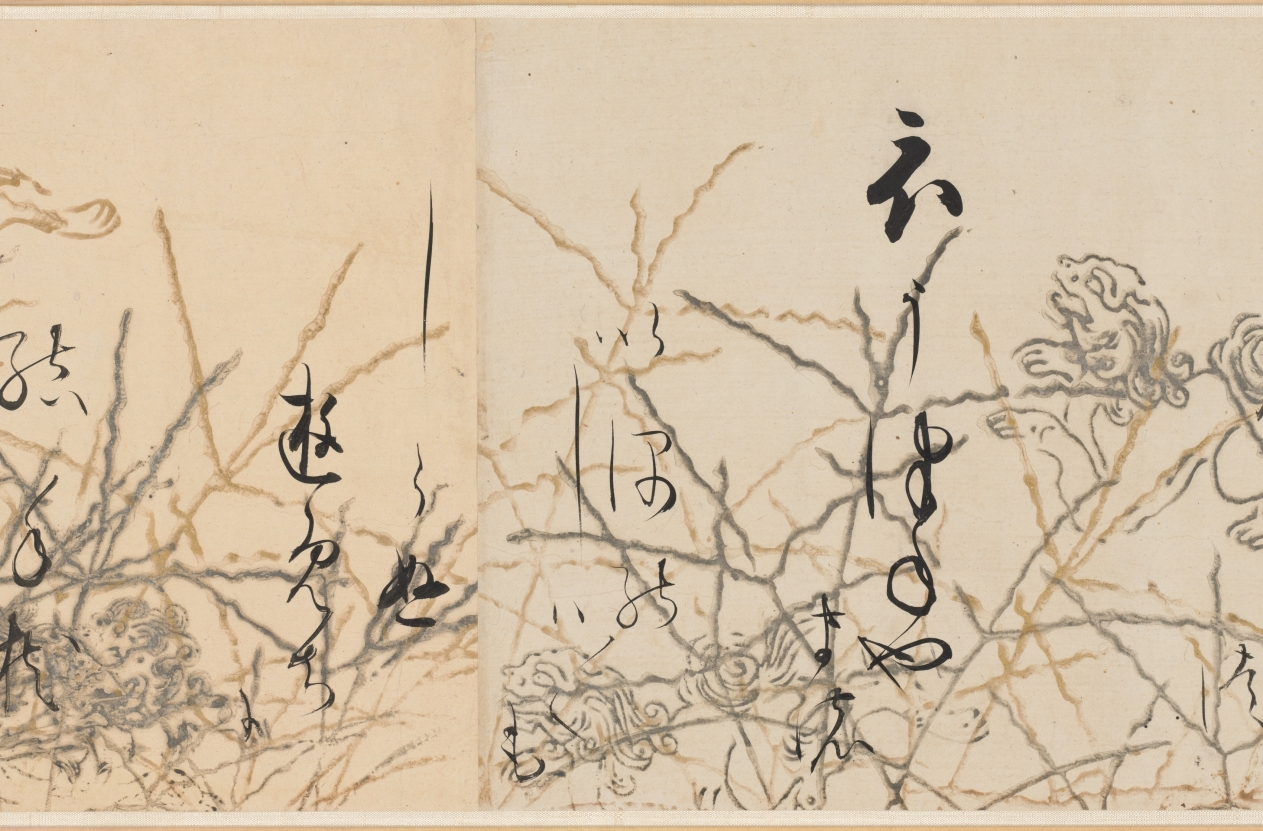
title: Selections from the New Collection of Japanese Poems from Ancient and Modern Times (Shinkokin wakashū) with Printed Designs of Chinese Lions and Crab Finger Grass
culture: Japan, Edo period (1615–1868)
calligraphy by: Hon'ami Kōetsu (Japanese, 1558–1637)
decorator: Tawaraya Sōtatsu (Japanese, c. 1570–c. 1640)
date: early 1600s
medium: handscroll; ink, gold, and silver on paper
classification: Calligraphy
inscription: Seal: 光悦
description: Hon’ami Kōetsu was a calligrapher and craftsman who frequently collaborated with the painter Tawaraya Sōtatsu, considered the first master of the Rinpa school. Kōetsu brushed seven poems from the autumn section of a poetry anthology onto dyed paper with motifs designed and printed in gold and silver by Sōtatsu.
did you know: Before becoming a master painter of screens, Tawaraya Sōtatsu painted fans.